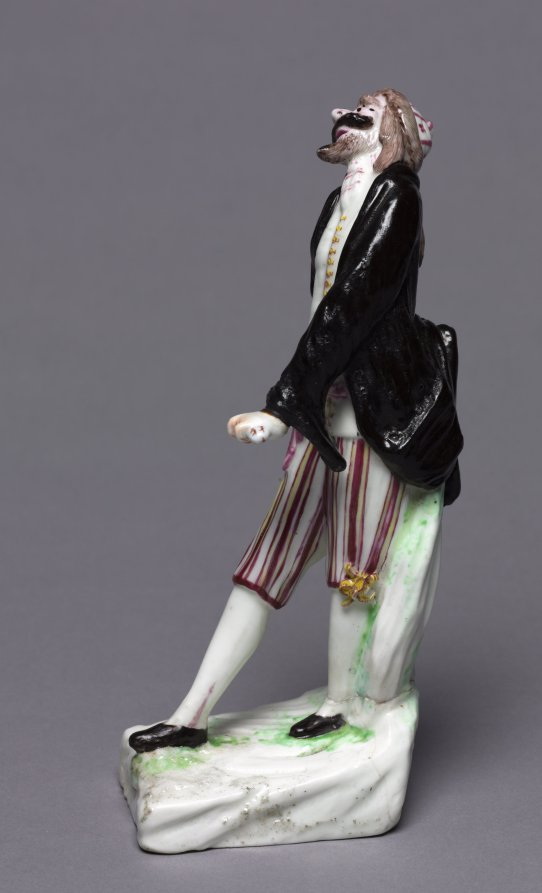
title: Figure of Pantalone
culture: France, Mennecy, 18th century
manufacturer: Mennecy Factory (French)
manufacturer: Mennecy- Villeroy Factory (French)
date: c. 1755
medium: soft-paste porcelain with enamel decoration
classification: Ceramic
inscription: Mennecy-Villeroy factory mark, incised on bottom: "DV"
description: The commedia dell’arte, a form of Italian improvisational theater, became widely popular in 18th-century Europe. This figure, with his prominent beard and distinguishing black robe, represents the character of elderly Venetian merchant Pantalone. Depicted in paintings and porcelain, the popularity of these figures demonstrated the influence of the theater on the tastes of the wealthy.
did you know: In the commedia dell’arte, Pantalone was known for his greed, lust, and buffoonery that made him the target of jokes.